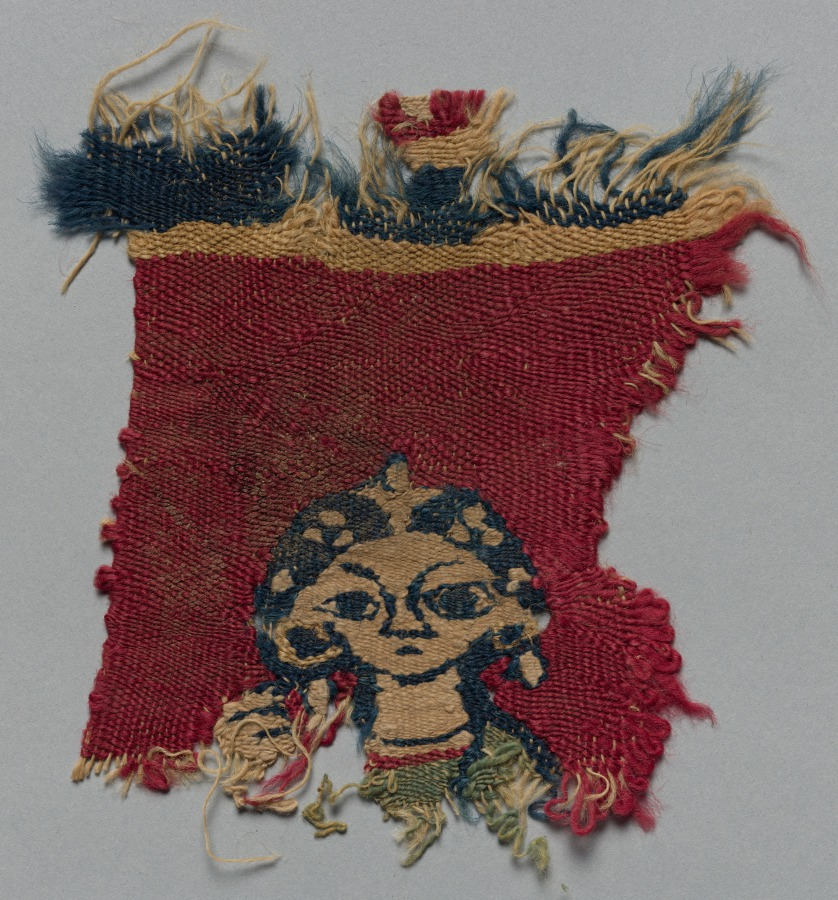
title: Fragment, Probably from a Hanging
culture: Iran or Iraq, Abbasid period (750–1258)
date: 800s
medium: tapestry; wool and cotton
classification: Textile